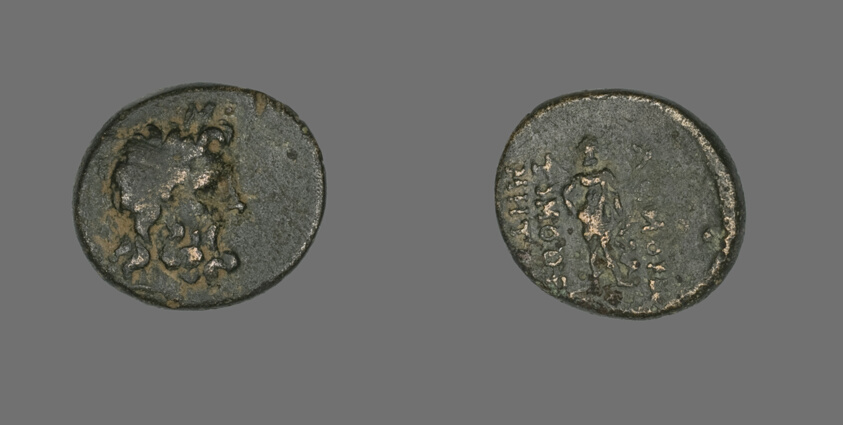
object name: Coin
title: Coin Depicting the God Zeus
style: greek, ancient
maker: Greek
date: mid–1st century BCE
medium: Bronze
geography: Greece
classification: coin; ancient art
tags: gods (deities), zeus